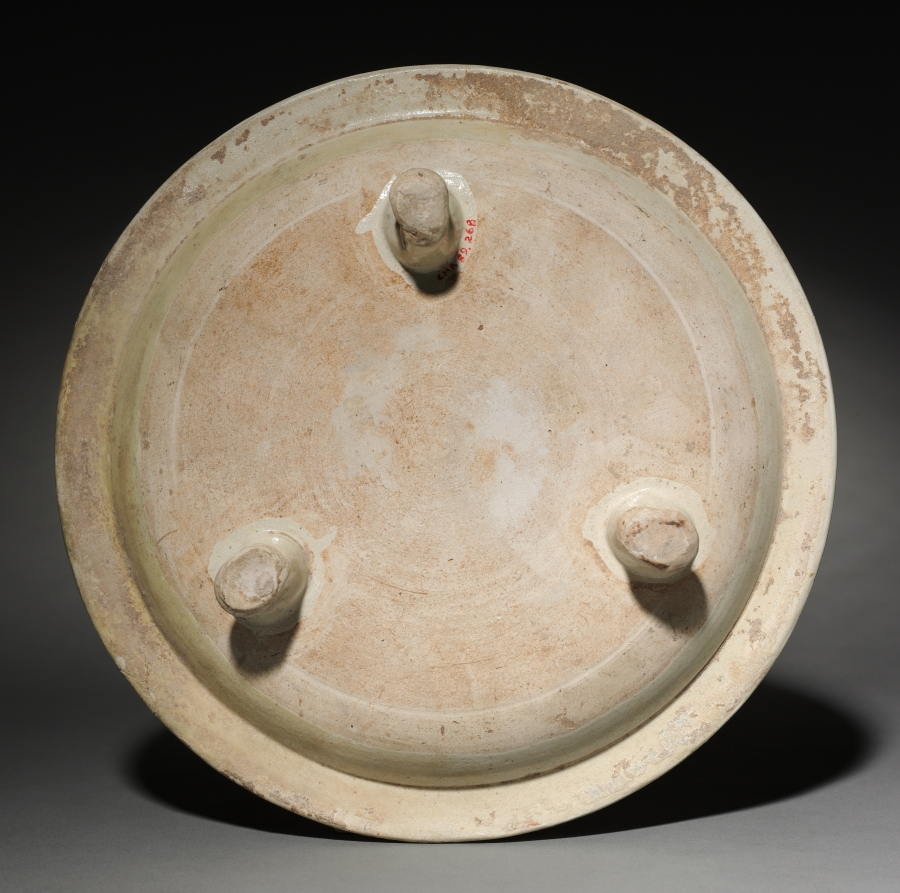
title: Footed Plate with Floral Medallion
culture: China, Tang dynasty (618-907)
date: early 700s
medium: glazed earthenware with impressed decoration, sancai (three-color) ware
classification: Ceramic